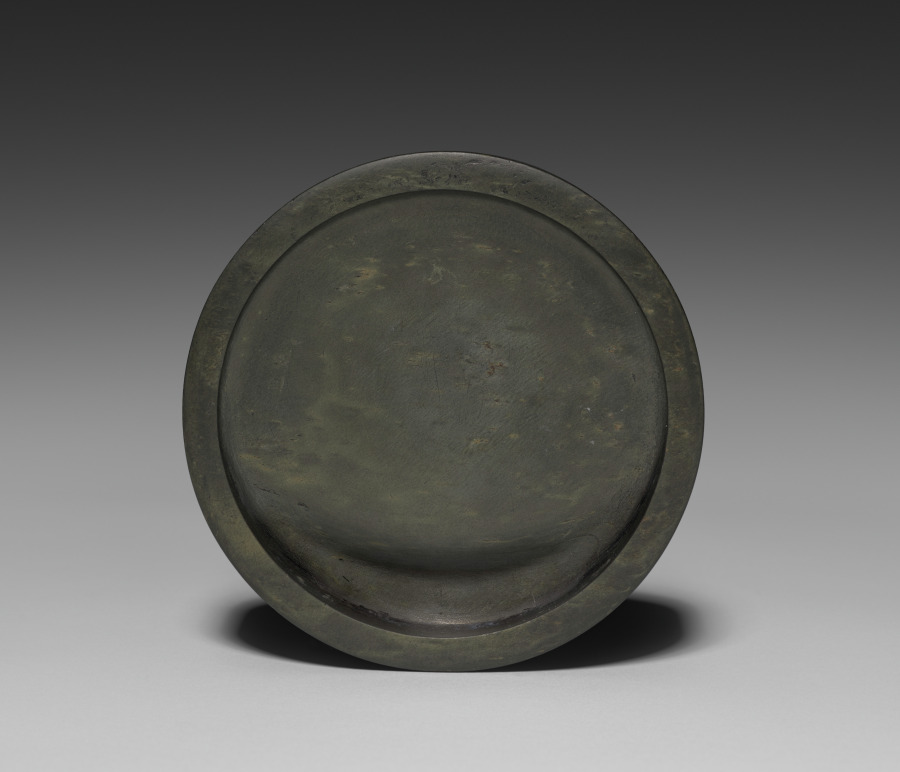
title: Inkstone in the Shape of a Roof Tile with Seal Script Characters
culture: China, Qing dynasty (1644–1911)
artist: Workshop of Jian Guzhai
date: 1700s–1800s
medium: She stone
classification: Stone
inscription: 七葉永祥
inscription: 「鑑古齋仿製」 「穎川春暉館文寶」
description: This inkstone is particularly noteworthy for its inscriptions in two styles. The base shows four characters in seal script (zhuanshu) expressing auspicious, or favorable wishes, while the characters on the side in standard script (kaishu) record the name of the workshop and that of the collector’s studio. Inkstones were used to grind solid ink cakes with the addition of water to produce liquid ink for brush painting and calligraphy.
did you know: The four large seal script characters on the base of this inkstone, 七葉永祥, may be read as "eternal good fortune for seven generations."